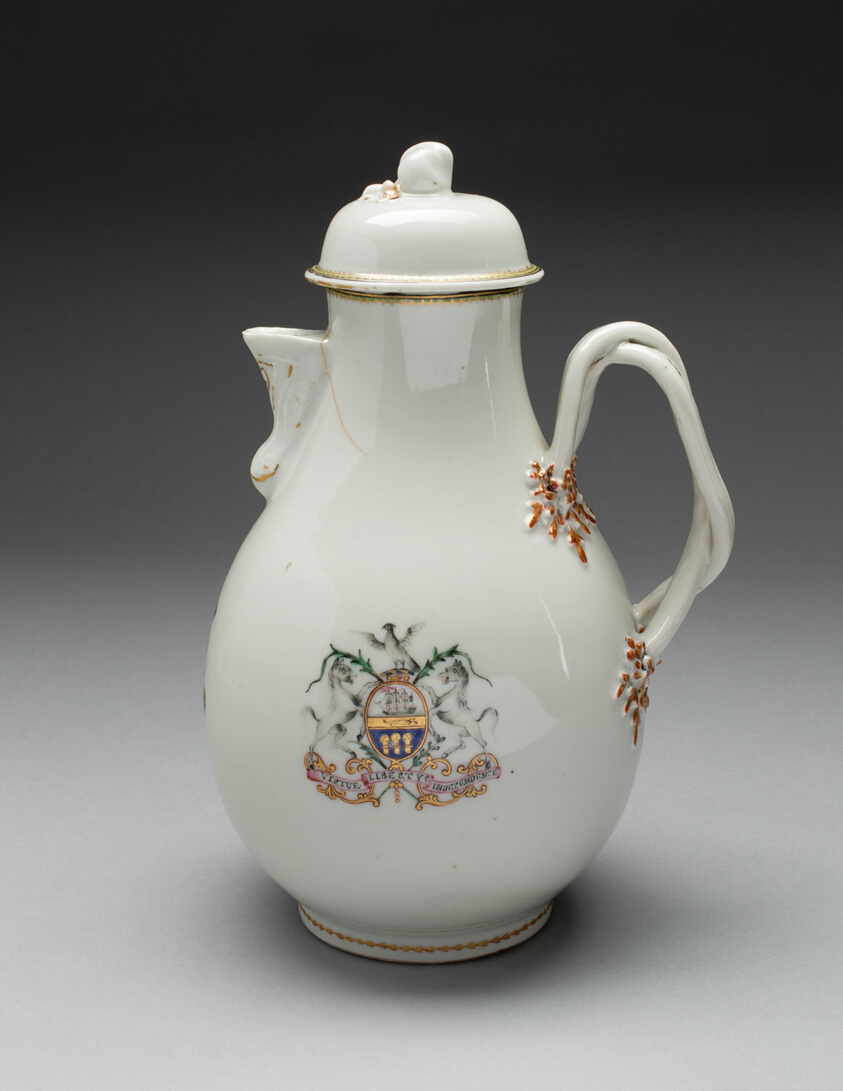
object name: Ceramics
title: Jug with Lid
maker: China; Chinese, made for the American market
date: c. 1785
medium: Porcelain and enamel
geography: China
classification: tableware; art of the americas; porcelain; european decorative arts; ceramics; decorative arts; American market; chinese export porcelain; pottery